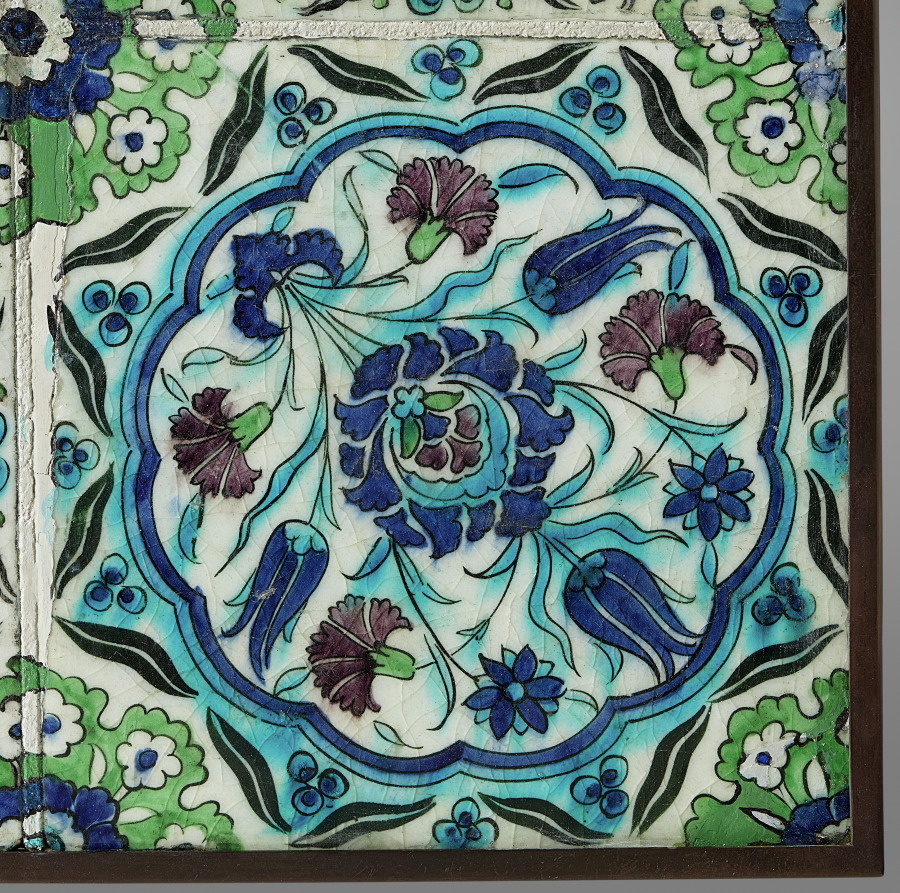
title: Wall Tile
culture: Turkey (Iznik), Ottoman Period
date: 1600s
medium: fritware with underglaze-painted design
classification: Ceramic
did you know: When joined with the other three tiles, another complete medallion is formed.